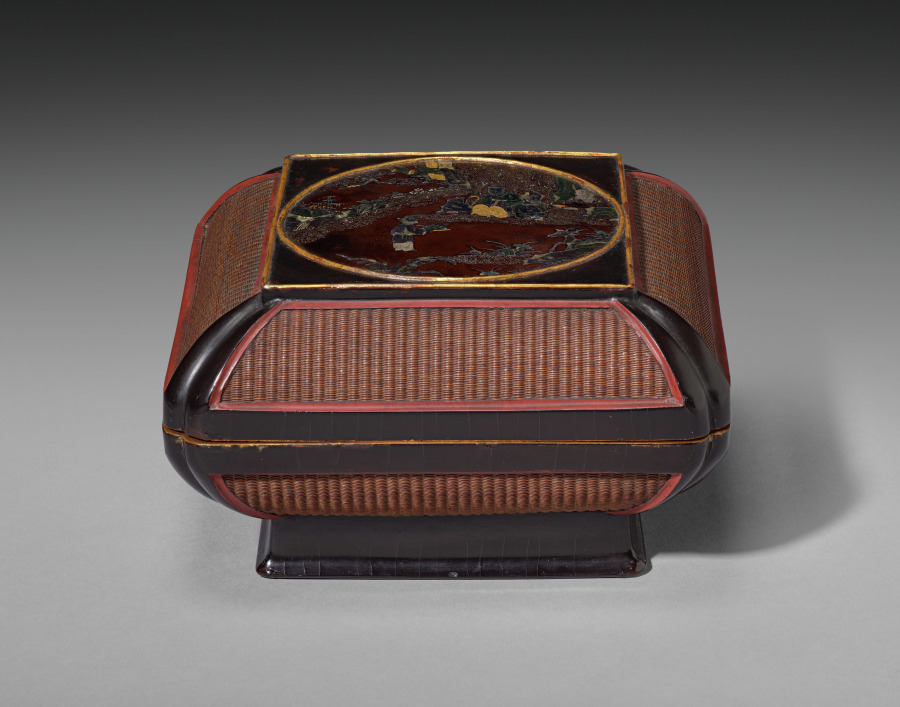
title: Wickerwork Box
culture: China, Ming dynasty (1368-1644), Wanli reign (1572-1620)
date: 1609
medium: lacquered wickerwork (of woven bamboo) framed in wood with circular scene inlaid in mother-of-pearl and gold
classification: Lacquer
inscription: Inscription at bottom in red on black lacquer reads: "commissioned by Yü-Yün-ch'i".